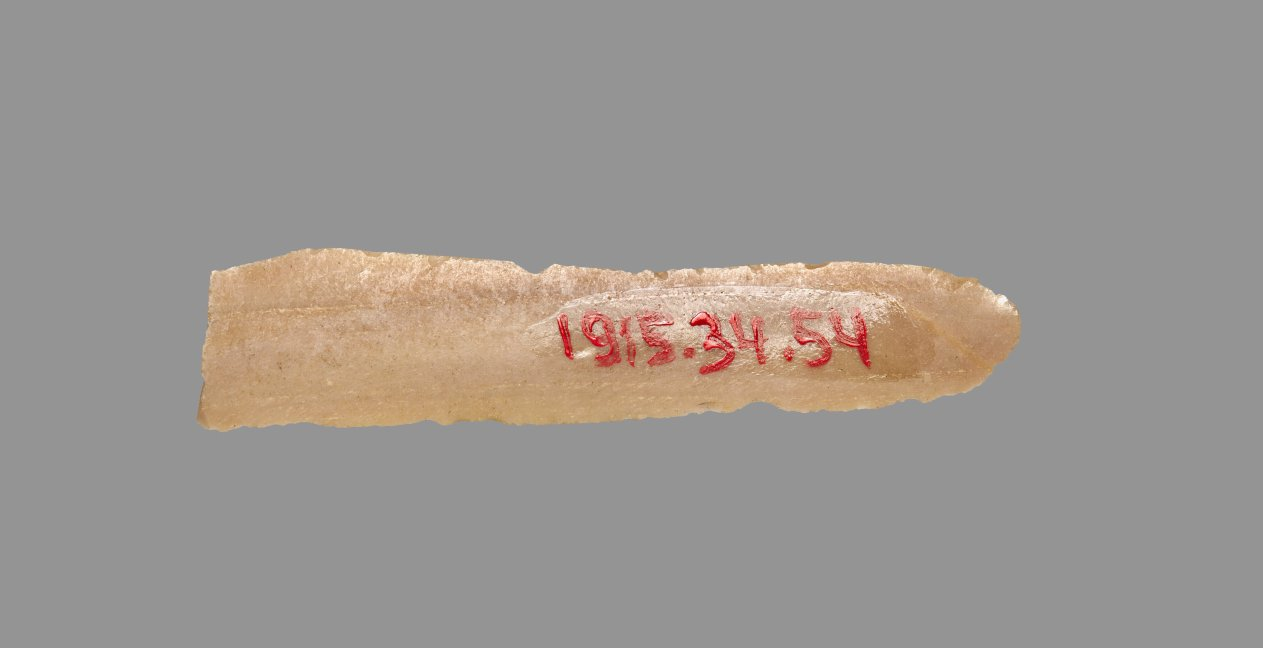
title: Sickle Blade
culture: Egypt, Middle Kingdom (2040–1648 BCE), Dynasty 12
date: 1980–1801 BCE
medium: flint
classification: Implements